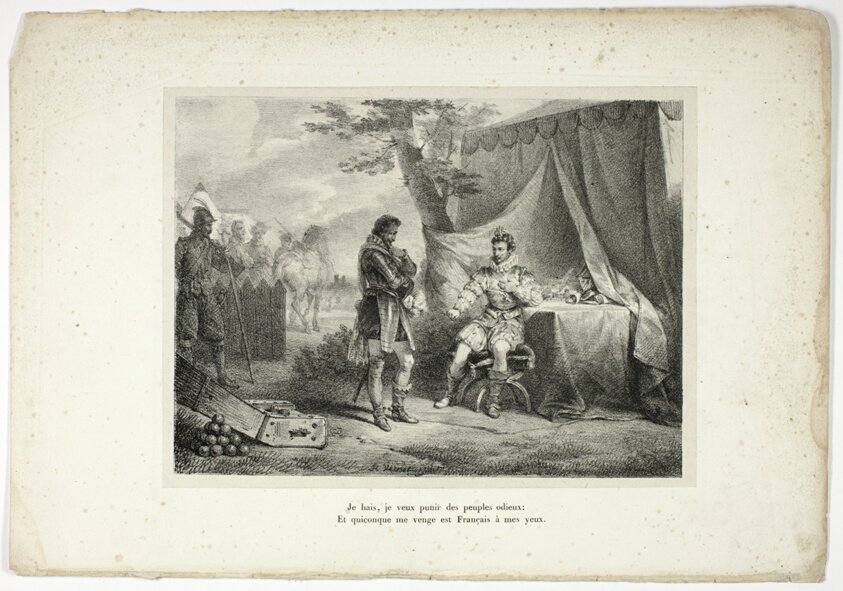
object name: Print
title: Je hais, je veux punir des peuples odieux...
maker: Horace Vernet (French, 1789-1863); poem by Voltaire (French, 1694-1778); published by Dubois (French, 18th-19th century)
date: 1825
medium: Lithograph in black on gray chine, laid down on ivory wove paper (chine collé)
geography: France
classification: lithograph; print; prints and drawing